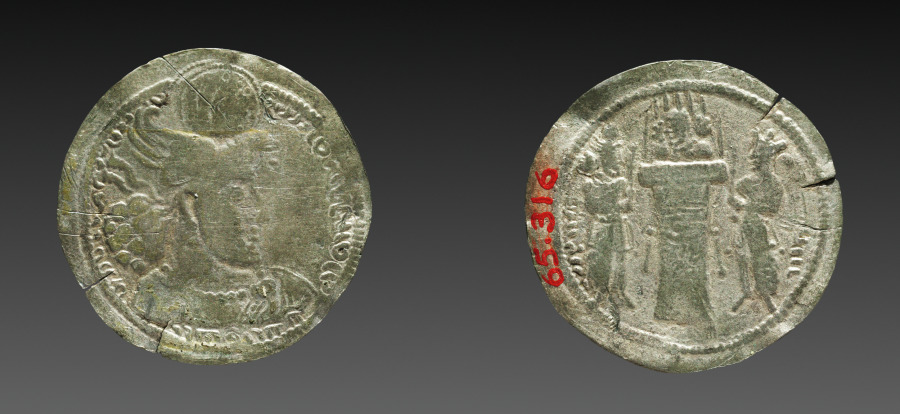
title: Drachm: Bust of Hormizd II (obverse); Fire altar with Bust (reverse)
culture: Iran, (minted), Sasanian Empire (224–651 CE), reign of Hormizd II (303–309)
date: 302–9 CE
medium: silver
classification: Coins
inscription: 𐭬𐭦𐭪𐭠𐭠𐭭𐭬𐭫𐭪𐭠𐭠𐭩𐭫𐭠𐭭𐭬𐭭𐭪𐭲𐭥𐭬𐭭𐭩𐭦𐭣𐭠𐭭 𐭬𐭦𐭣𐭩𐭮𐭭𐭡𐭢𐭡𐭥𐭧𐭬𐭦𐭣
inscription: 𐭠𐭲𐭥𐭫𐭦𐭩𐭠𐭥𐭧𐭬𐭦𐭣